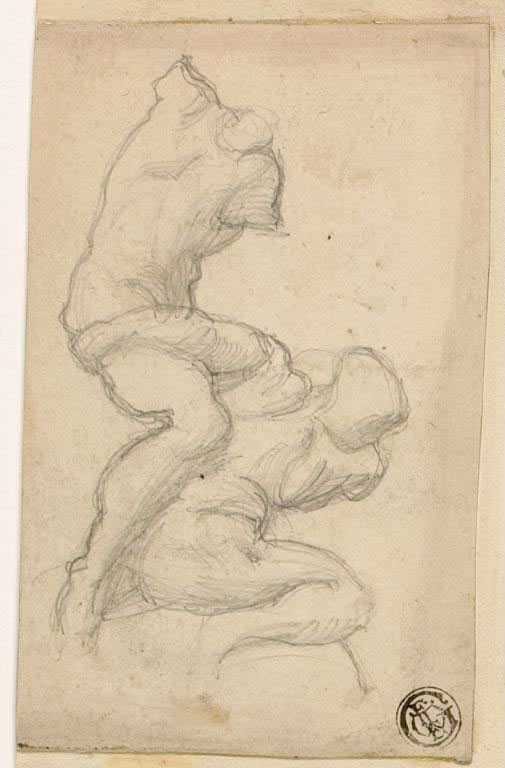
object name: Drawing and Watercolor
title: Two Struggling Figures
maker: Henri Regnault (French, 1843-1871); after Michelangelo Buonarroti (Italian, 1475-1564)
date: c. 1867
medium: Graphite on ivory wove paper, laid down on ivory wove paper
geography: France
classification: graphite; drawings (visual works); prints and drawing